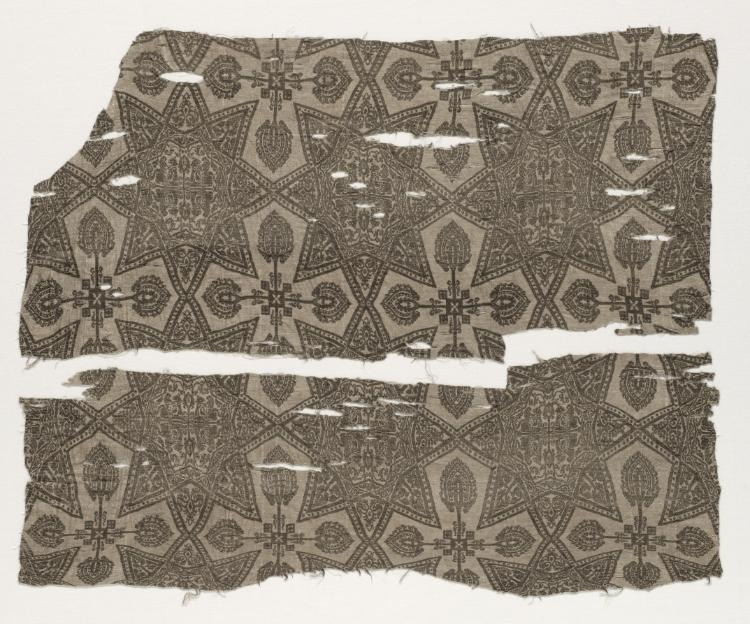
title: Fragments with Eight-Pointed Star (Two Pieces)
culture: Iran (?)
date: before 1966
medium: Silk: compound weave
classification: Textile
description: In aligned rows and columns, this textile preserves two rows of three eight-pointed stars and fragments of stars on all four sides. Each eight-pointed star has a narrow border of pearls that encloses a 16-pointed star with a border of scrolling foliate motif. The inner star has a design in the upper half that is repeated in mirror image in the lower half; it consists of pair of winged quadrupeds flanking a tree of life. All interstices in both stars are filled with a stylized floral motif. Interspaces are ornamented with a cross of four-directional palmettes.